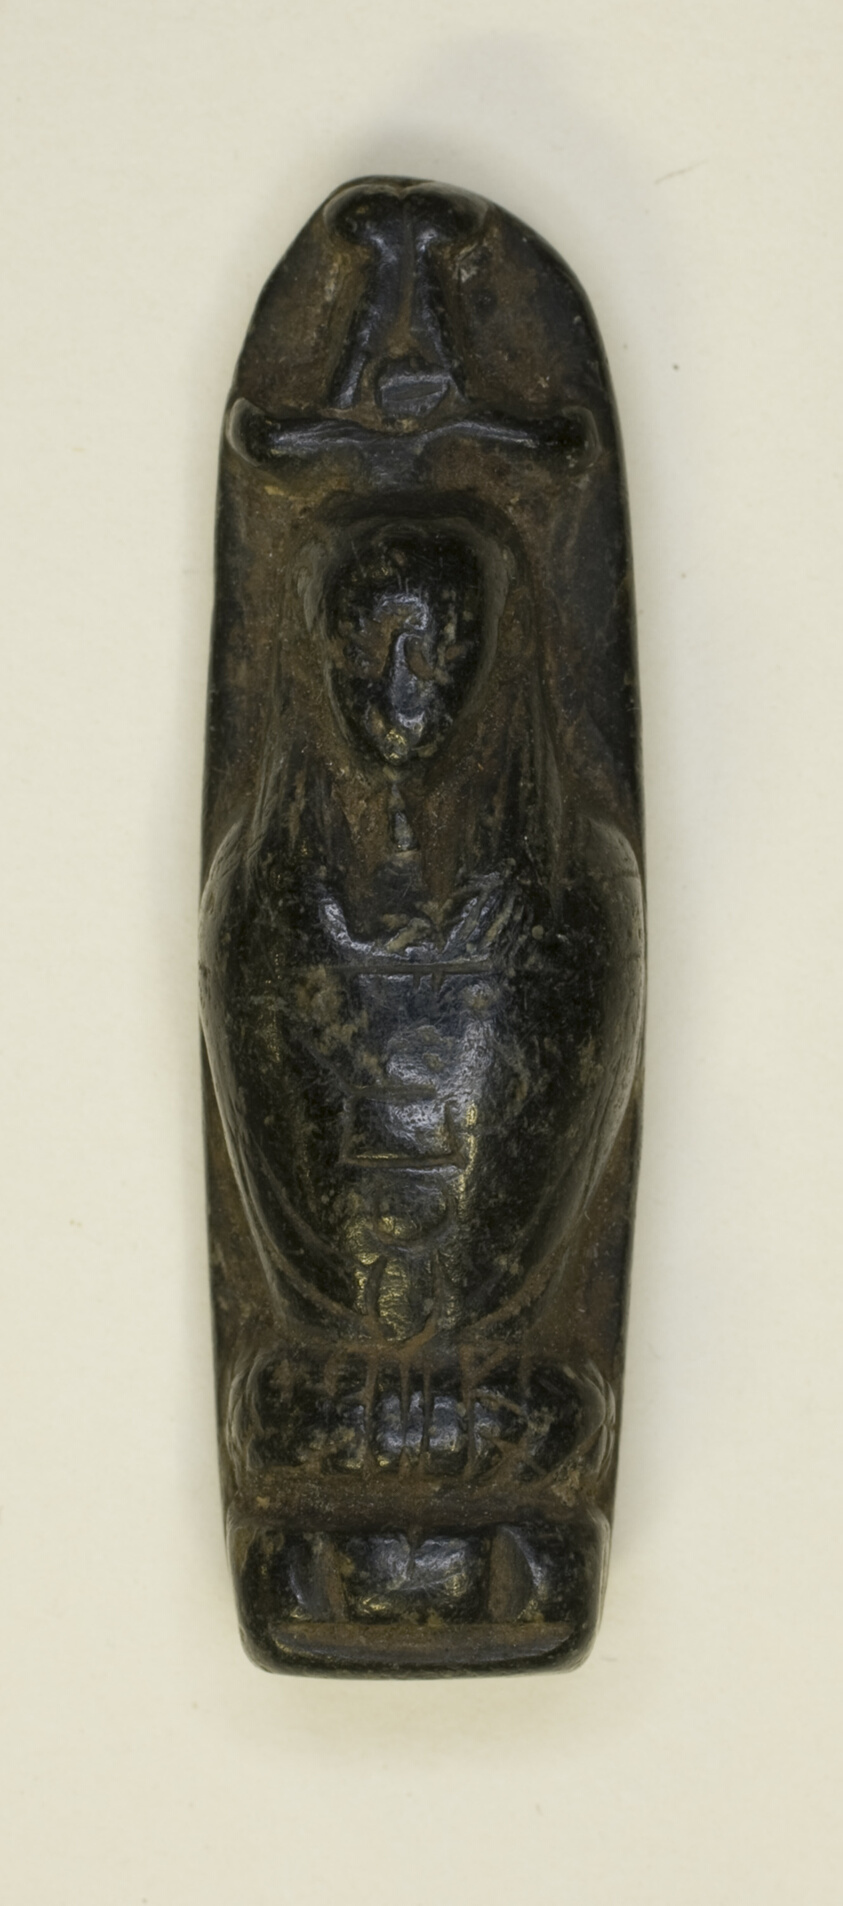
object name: Costume and Accessories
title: Amulet of the God Osiris-Canopus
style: roman period (egyptian), ancient, egyptian, greco-roman (egyptian)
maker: Roman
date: 2nd century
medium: Steatite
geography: Egypt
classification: amulet; jewelry; stone; ancient art; costume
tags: gods (deities), deities